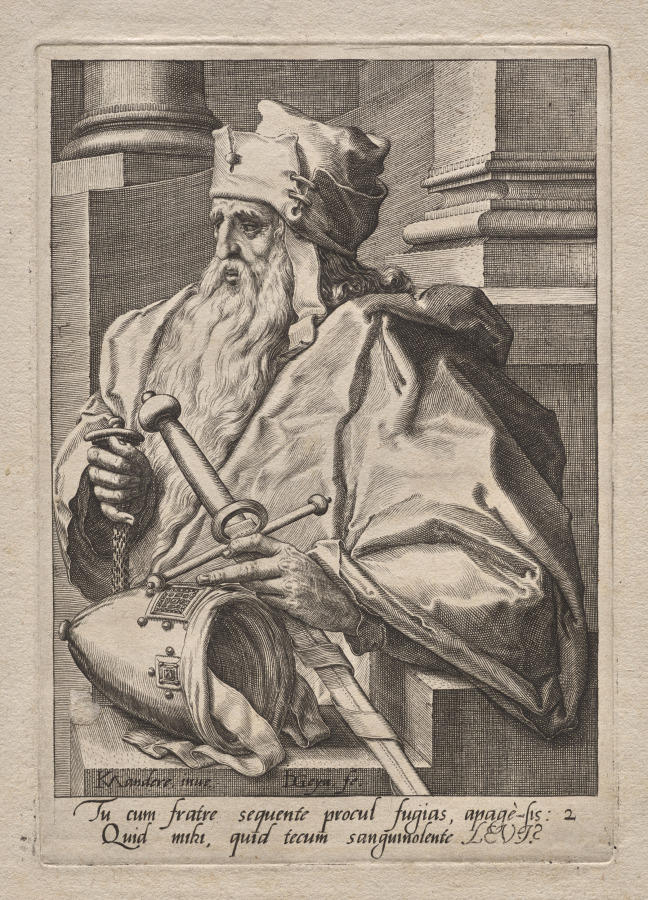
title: Plate 2: Levi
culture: Netherlands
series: The Twelve Sons of Jacob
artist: Jacob de Gheyn II (Netherlandish, 1565–1629)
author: after Karel I van Mander (Netherlandish, 1548–1606)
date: c. 1589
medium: engraving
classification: Print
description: In this print, the biblical figure Levi holds a sword next to a bishop’s mitre, denoting his tribe’s association with the priesthood. This is one of a series of prints depicting the twelve sons of Jacob, each with an attribute and costume that denotes his character. According to the Old Testament, Jacob blessed each of his twelve sons, prophesizing the destiny of their tribe, and assigning them a parcel of land in Canaan (present-day Israel). The print series was made in the Netherlands in the late 16th century, a time of political struggle when Old Testament heroes were popular exemplars of fortitude and patience.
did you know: The columnar architecture behind this Old Testament figure suggests the future of his tribe as members of the priesthood.